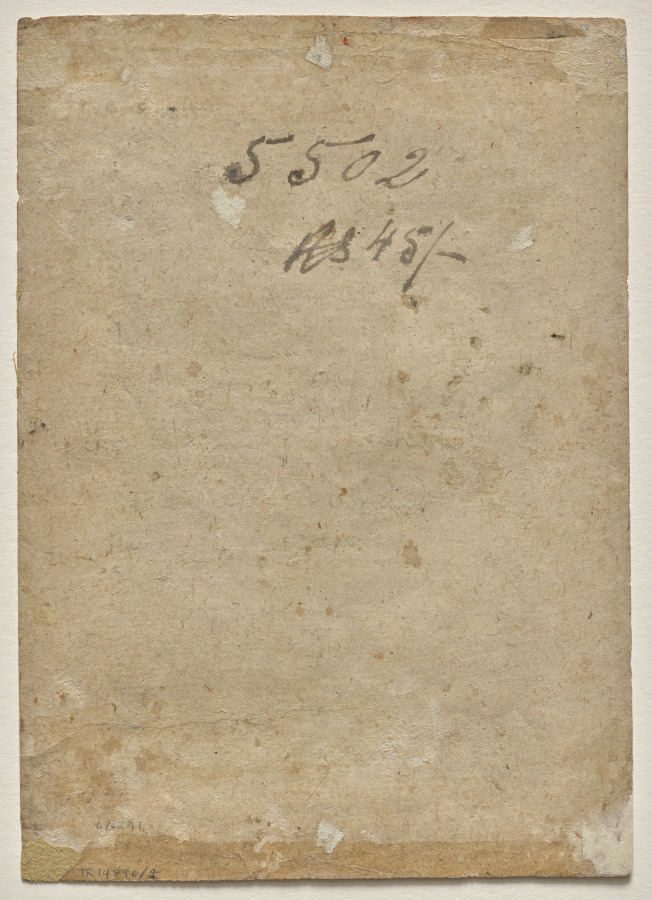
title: Markandeya Viewing Krishna in the Cosmic Ocean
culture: Northern India, Jammu and Kashmir, Pahari Kingdom of Basohli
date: c. 1680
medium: Gum tempera on paper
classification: Painting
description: The anonymous court artist from a Hindu kingdom in the foothills of the Himalaya mountains has chosen a web of concentric abstract shapes to represent the cosmic ocean as the backdrop for this elegant, striking composition. The sage Markandeya received the dubious gift of immortality, so even after the destruction and dissolution of the world and all its creatures, he must carry on exhausted and alone through the cosmic ocean until the next world cycle begins. At one point in the darkness he saw a branch from a banyan tree floating on the ocean’s surface, and with awe he saw the infant Krishna on one leaf, sucking his toe. When Markandeya looked into his mouth, he saw the entire universe as it was and as it will be. This story and imagery shows that with the destruction of the universe comes the infancy of evolution, and creation will begin anew.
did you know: Sherman E. Lee, who was the director of the Cleveland Museum of Art from 1958 until 1983, and his wife Ruth donated this painting.